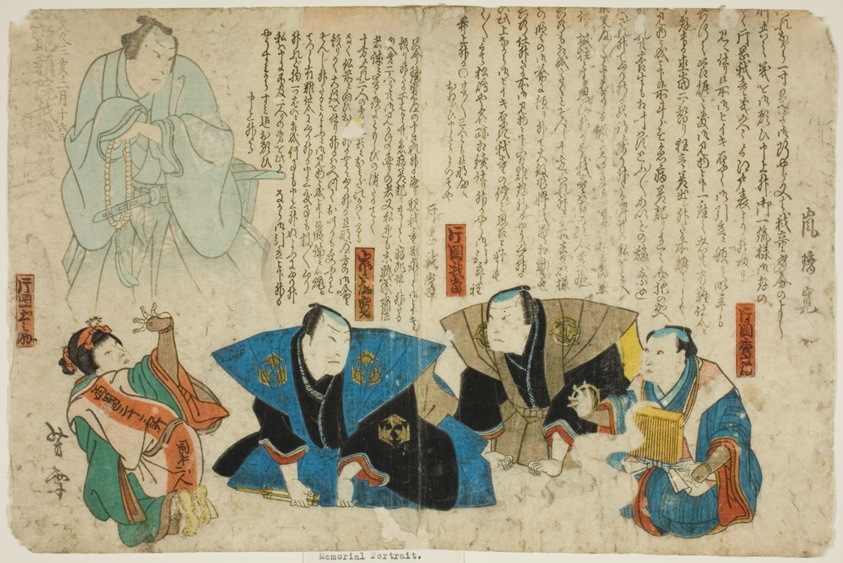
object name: Print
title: Actors Attending Memorial for Arashi Rikan III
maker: Mori Yoshiyuki (Nansuitei Yoshiyuki) (Japanese, 1835-1879)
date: 1863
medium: Color woodblock print; chuban diptych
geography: Japan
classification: print; asian art